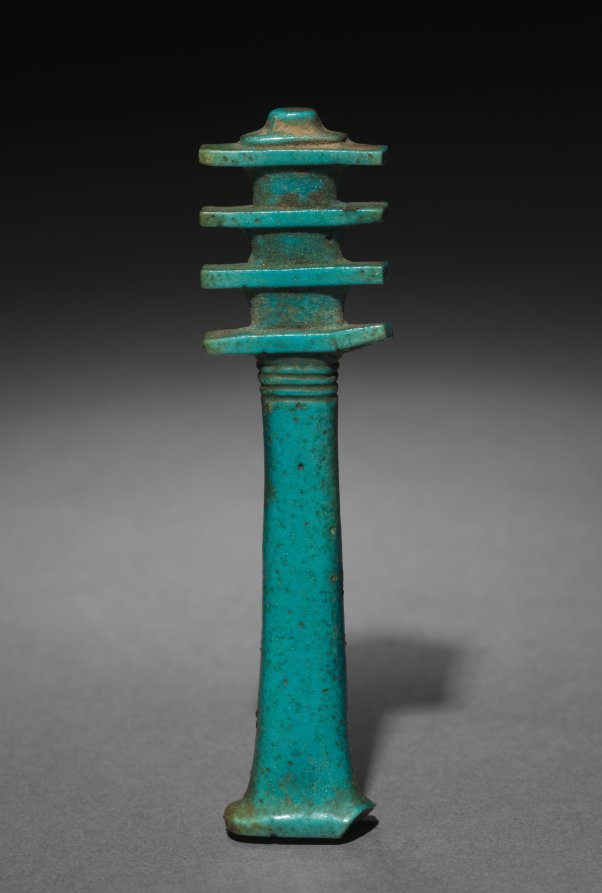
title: Djed-Pillar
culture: Egypt, Late period (715–332 BCE), Dynasty 26 or later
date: 664–525 BCE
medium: bright turquoise green faience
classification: Amulets